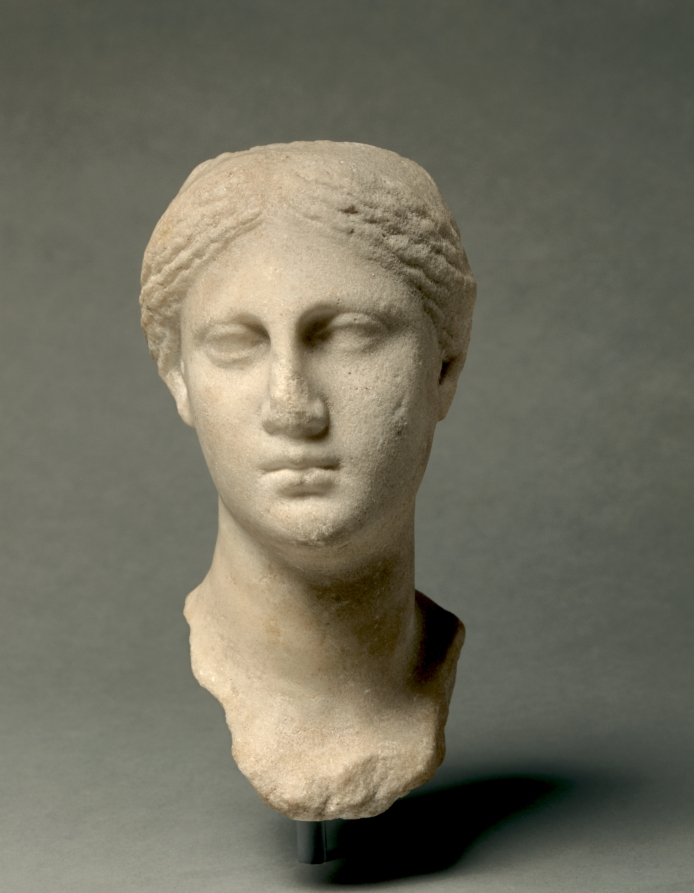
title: Head of a Woman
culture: Greece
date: 400–200 BCE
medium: marble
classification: Sculpture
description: This marble bust of a woman is rendered with the soft, delicate features typical of Greek sculpture of the late fourth and early third century BCE. Her features nearly disappear into the smooth landscape of her face, each curve fading softly into the next. Her hair is held away from her forehead in a series of tight braids pulled back to a bun, now mostly lost.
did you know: Though this hairstyle is often associated with sculptures of Aphrodite, it was also a popular style among mortal Greek women.